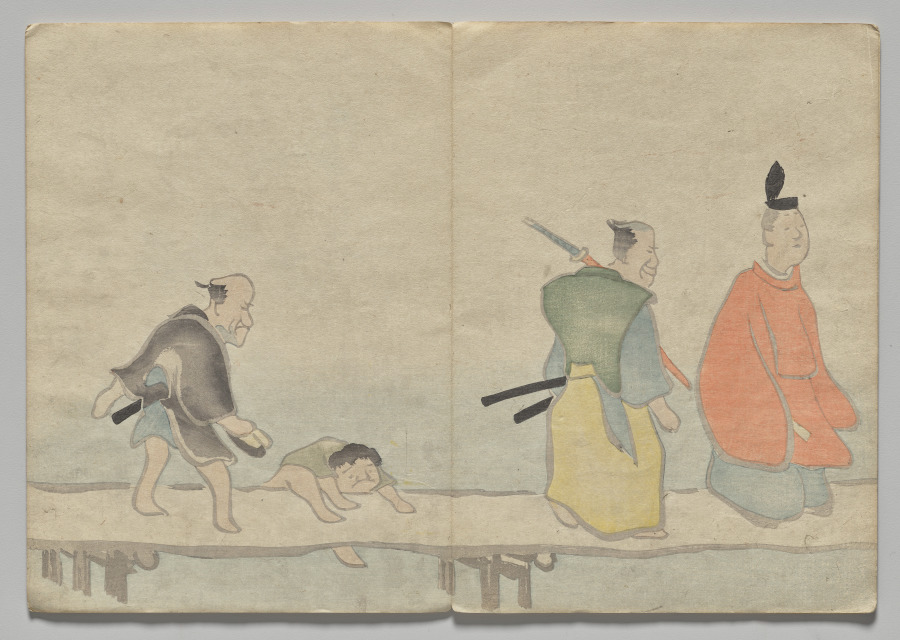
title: Scene from The Kōrin Picture Book (Volume 1)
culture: Japan, Edo period (1615–1868)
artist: Nakamura Hōchū (Japanese, d. 1819)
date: 1800s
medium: color woodblock printed book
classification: Bound Volume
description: Ogata Korin (1658-1716) was one of the most admired artists of Rimpa, or "decorative school painting." These books by the charming later-generation Rimpa artist Hochu record Korin's inventive designs.